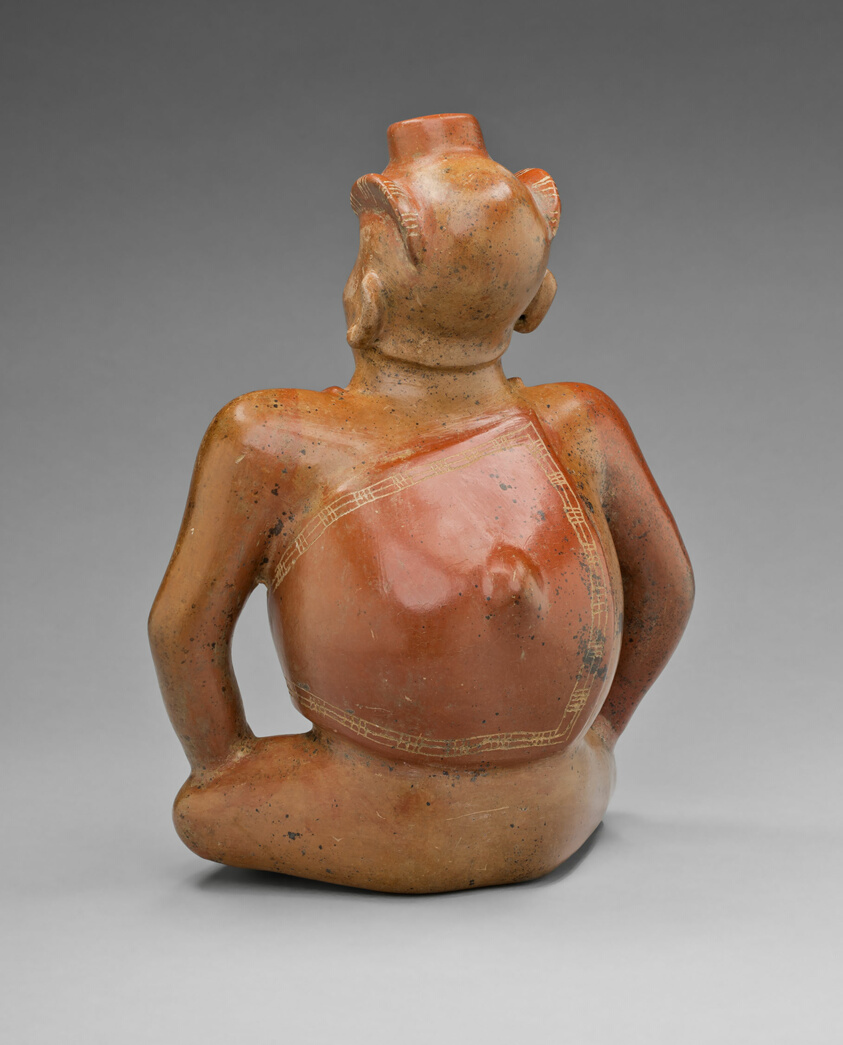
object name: Vessel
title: Vessel in the Form of a Seated Hunchback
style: colima, mesoamerican, Arts of the Americas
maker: Colima (Colima, Mexico)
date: 100 BCE–250 CE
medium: Ceramic and pigment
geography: Colima state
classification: vessel; art of the americas; ceramics